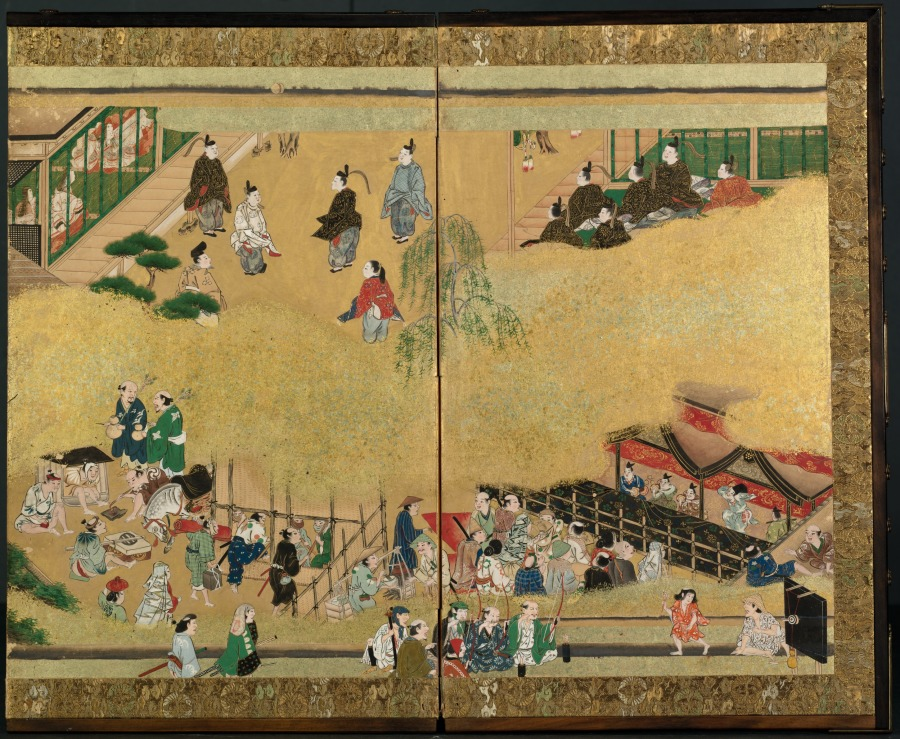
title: Festival Scenes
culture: Japan, Edo period (1615–1868)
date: 1600s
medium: One of a pair of six-panel folding screens; ink, color, gold, and gold leaf on paper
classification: Painting